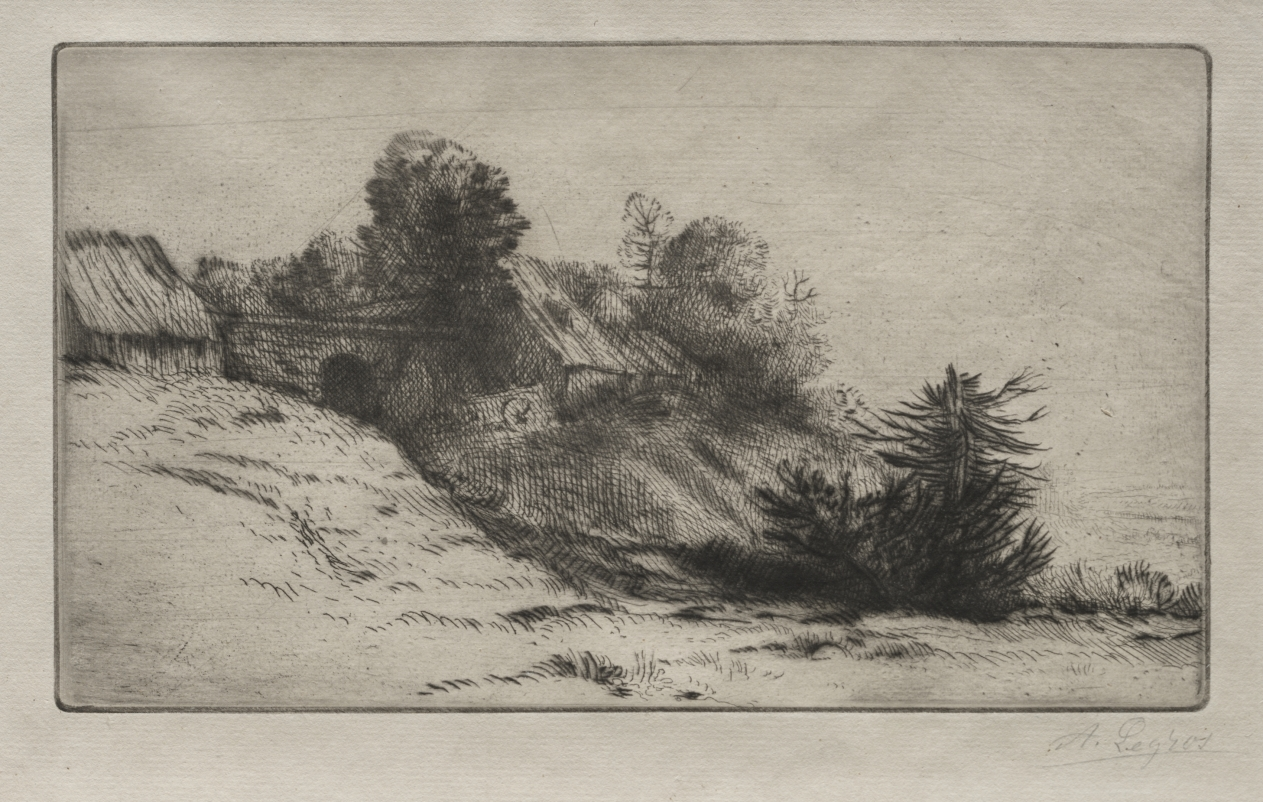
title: La ferme de Bienheureux (2nd Plate)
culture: France, 19th-20th century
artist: Alphonse Legros (French, 1837–1911)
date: c. 1857–1911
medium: etching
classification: Print